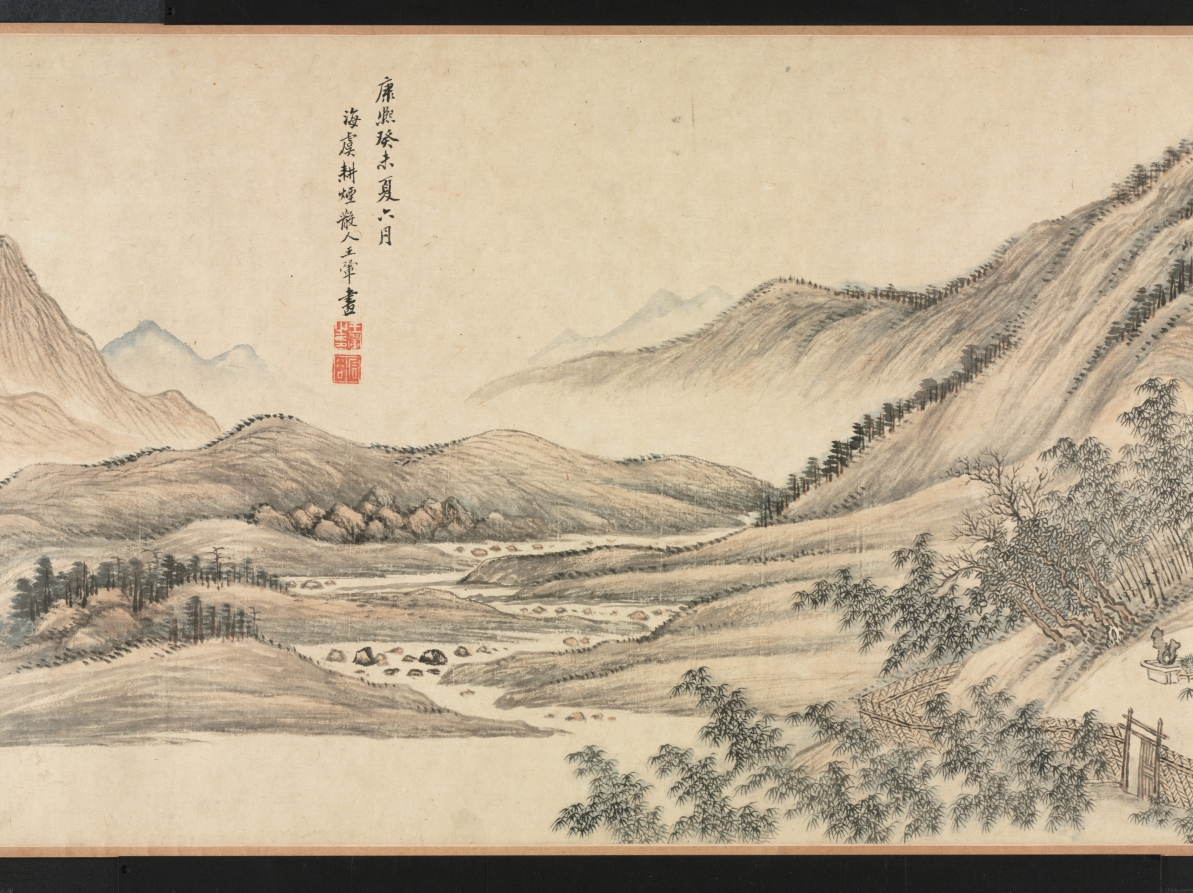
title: Hall of Lofty Pines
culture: China, Qing dynasty (1644-1911)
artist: Wang Hui (Chinese, 1632–1717)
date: 1703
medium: handscroll; ink and color on paper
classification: Painting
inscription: [題] 松喬堂圖 康熙癸未夏六月, 海虞耕煙散人王翬畫。[印]王翬之印; 石谷. [左下] 來青閣; 耕煙野老時年七十有二.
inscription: 松喬堂圖一卷，海虞石谷王君為靜海近公厲少司冦公作也。圖成于癸未之夏。未幾而公遂仙去。公令子今編修君南湖屬余題跋其後。余與公同官侍從，交契最深。側見公之清修純德，蔚為聖天子所眷重。侍直內廷，密勿贊襄，幾二十餘年。蒼生之所以受賜，士林之所以沐德者，天下莫能窺，在廷莫能悉。而公卒不言。以故宸衷日益契，恩禮亦日益渥。雖年逾懸車，時有歸老之念。而上固不聼公之去。其所謂松喬堂者，御書以賜公者也。蓋以松比公之清風勁節，而歲寒不改，經霜彌茂。則又以期公之壽考未有艾焉。公知此身未易乞，而山林槃磵之樂，止可寄諸寤思。此松喬堂圖之所由作也歟。石谷此圖，結構精密，筆墨超邁。其寫樹木之蒼蔚，堂宇之靚幽。恍見摩詰輞川樂天廬山之勝。獨惜公未得一日徜徉故園以償其願。即繪於圖亦未得以永其趣，此編修君之所以眷眷不忘也。雖然千歳之松喬，下蔭百畝，上以修棟梁之需。然則上當日名堂之意，不更望於後之人襲其芘而養其材也哉。吾願編修君之寶斯圖。并望君之塗塈丹雘，大其堂構也已矣。 康熈丙戍重陽三日，雲間王鴻緒跋。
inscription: 10 additional seals: 1 seal of Li Duna 勵杜納 (1628–1703); 4 seals of Zha Ying 查瑩 (jinshi of 1766); 5 seals of Li Yun (dates unknown).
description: Wang Hui 王翬, a leading painter in the orthodox school of the early Qing dynasty (1644–1911), was commissioned to paint this landscape with a country estate for Li Duna 勵杜納 (1628–1703), vice minister of justice in Emperor Kangxi’s court. The emperor had honored Li by granting him a piece of calligraphy with the name of Li’s retirement retreat, “Hall of Lofty Pines.” He drew a comparison between pines and Li’s upright character, resilience, and longevity. Wang Hui’s painting was supposed to allow Li to imagine living in a beautiful, secluded compound among the hills and pines. Sadly, Li died before seeing the completed painting and before receiving the emperor’s permission to retire. The landscape begins with peaceful riverbanks and low hills. The pines around the estate in the middle of the handscroll are truly lofty, some stretching even beyond the frame of the painting. Li Duna, the estate’s owner, is shown twice in his serene mountain retreat: first approaching the entrance to the compound with two servants at the right, and then later in the scroll, to the left, reading in the comfort of an inner room.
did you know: One servant carries the estate owner's carefully wrapped qin, a type of zither.